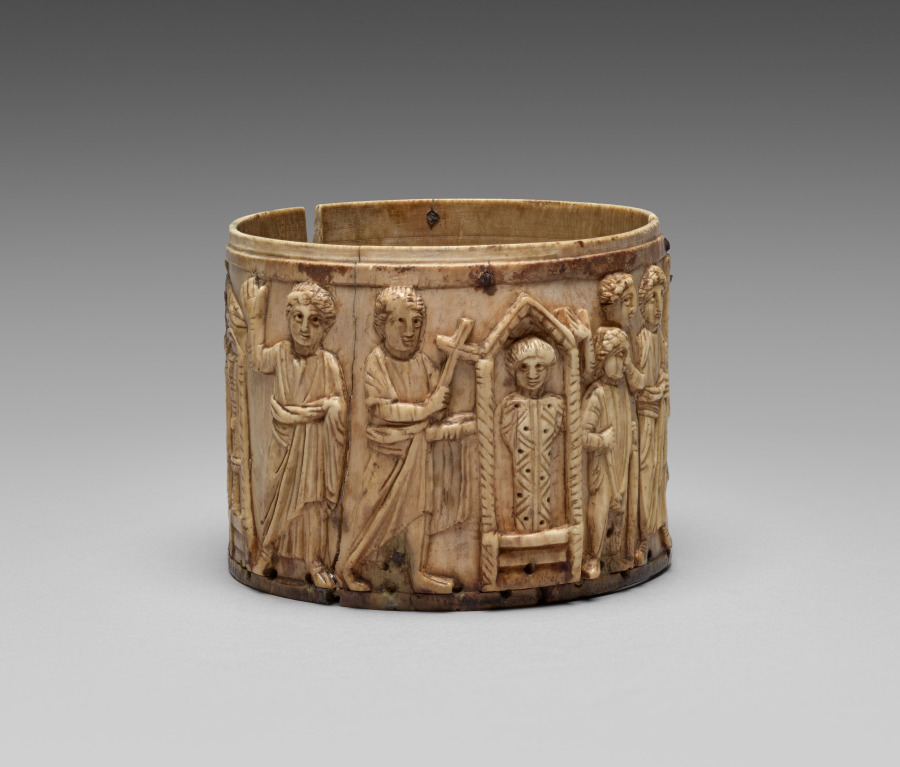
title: Ivory Pyx (Box)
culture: Byzantium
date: 500s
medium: ivory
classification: Ivory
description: Elaborately carved from a section of an elephant’s tusk, this ivory pyx (Greek for "box") depicts a number of New Testament scenes, namely the Annunciation, Christ’s entry into Jerusalem, Christ raising Lazarus, and Christ healing the blind man. It also depicts a Christian altar with chalices, possibly indicating the box’s use in a liturgical context.